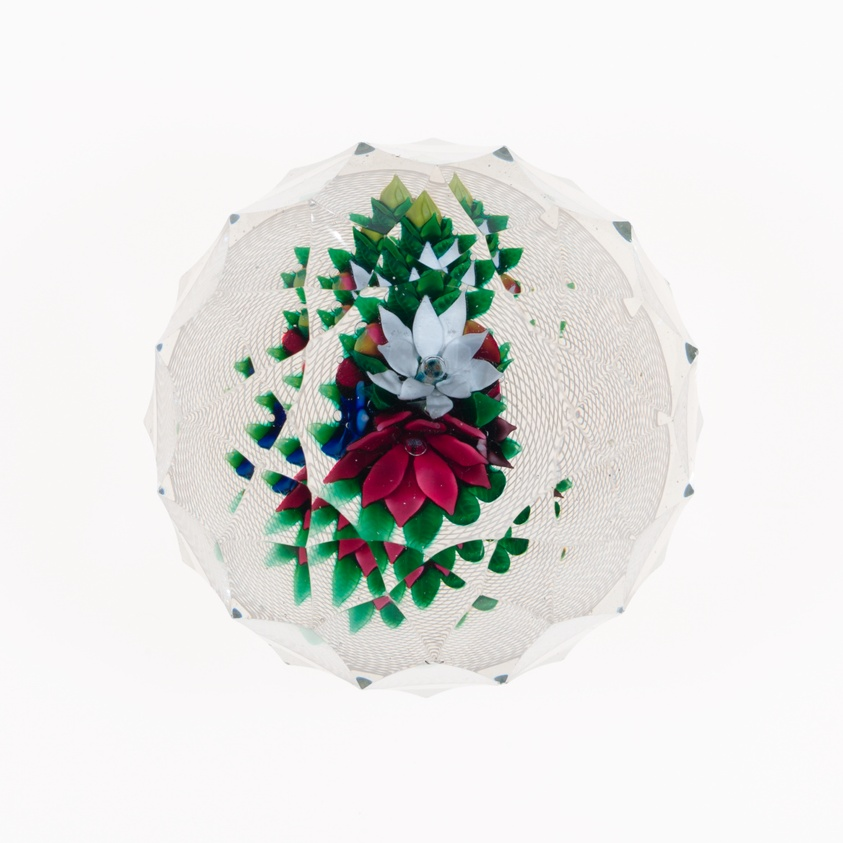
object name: Glass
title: Paperweight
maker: Boston and Sandwich Glass Company (Sandwich, Massachusetts, 1826-1888)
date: c. 1850–1900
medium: Glass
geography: Sandwich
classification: paperweight; fauna/flora/fruit; european decorative arts; glass